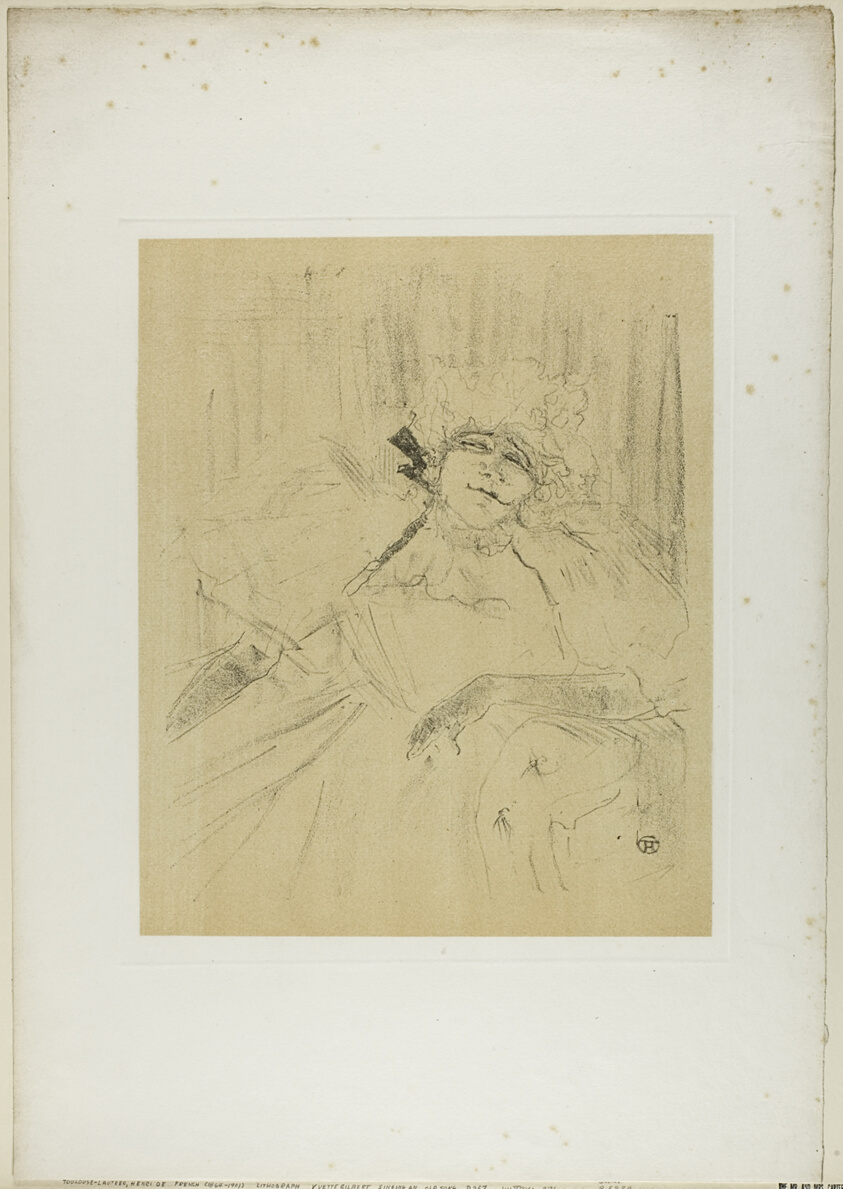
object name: Print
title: Yvette Guilbert—Chanson Ancienne, from Yvette Guilbert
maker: Henri de Toulouse-Lautrec (French, 1864-1901)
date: 1898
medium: Lithograph with beige tint stone, on ivory laid paper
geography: France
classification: lithograph; print; prints and drawing